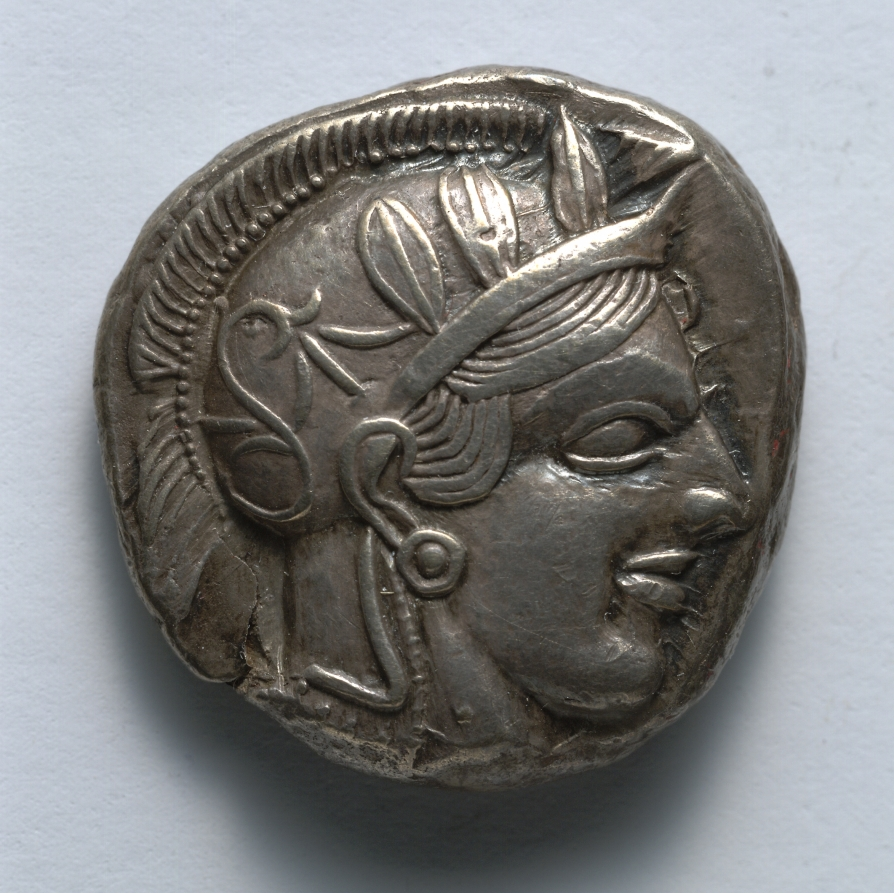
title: Tetradrachm: Head of Athena (obverse)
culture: Greek, minted at Athens (Attica)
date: 449–407 BCE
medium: silver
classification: Coins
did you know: The basic design of Athenian tetradrachms is now back in use, on Greek one-Euro coins.